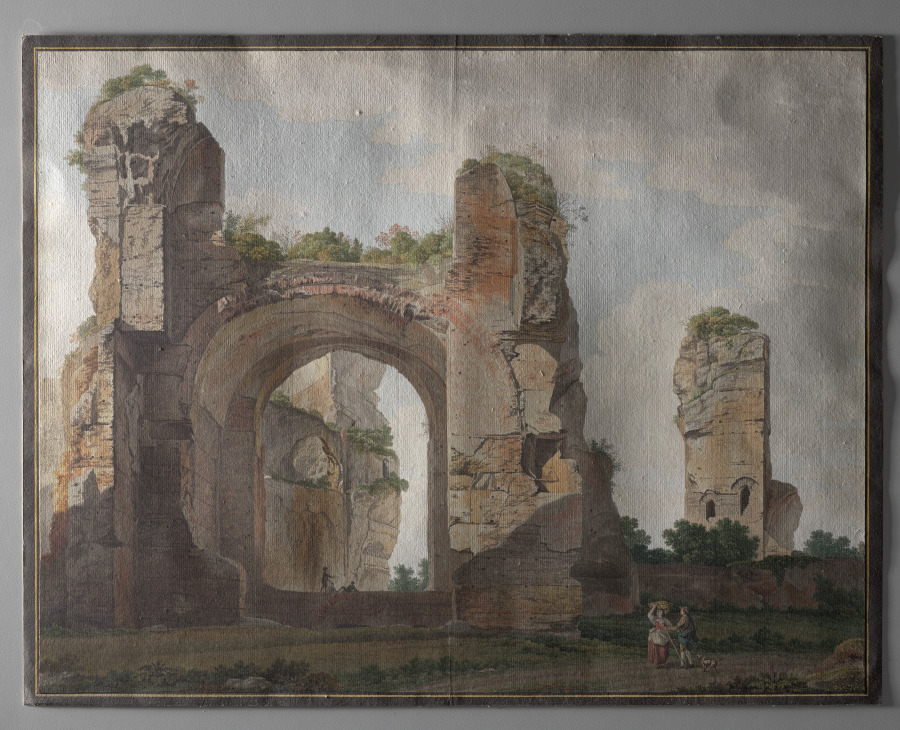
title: A View of the Ruins of the Baths of Caracalla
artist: Giovanni Battista Lusieri (Italian, 1750–1825)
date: 1779–81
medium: graphite, pen and black ink, watercolor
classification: Drawing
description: Lusieri was known among his Grand Tour patrons for his meticulous technique and his originality: for example, his choice of an unusual view of the Baths of Caracalla, as here, taken from within the ancient site. With an astonishing commitment to the truthful depiction of nature and ruins, and an extreme awareness of the nuances of light at different times of day, he depicted the ruins in the late afternoon. The presence of figures emphasizes the massive scale of the ruins in the warm Italian sun in this significantly large, impressive sheet, a welcome souvenir to his patron, an English Lord, when he returned to England.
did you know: The artist Lusieri accompanied the British Lord Elgin to Athens in the late 1790s and participated in the dismantling of the Parthenon’s metope sculptures there, now famously called the Elgin marbles.